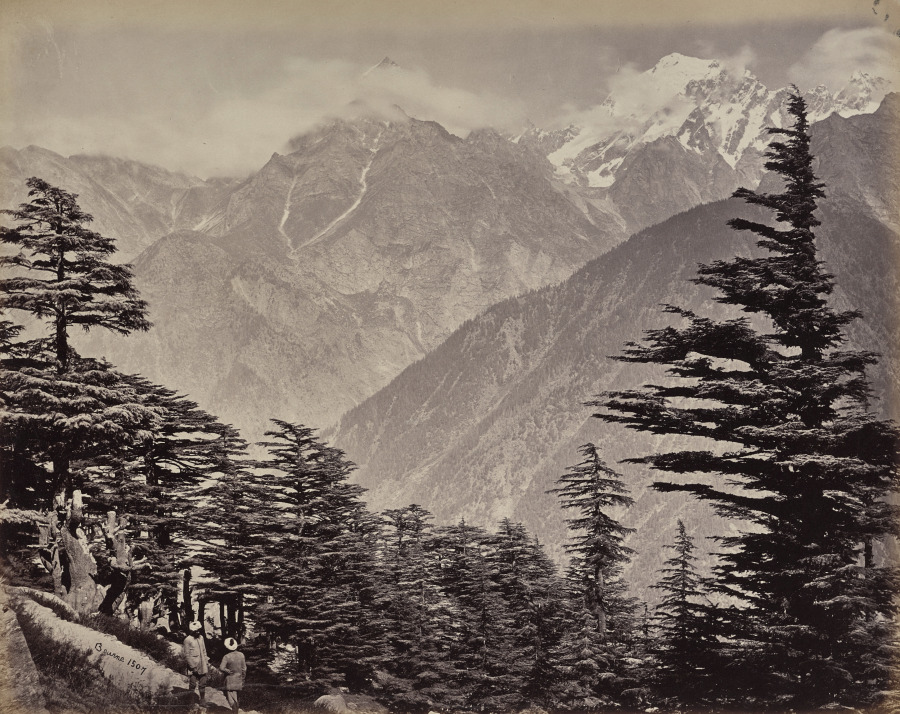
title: The Upper Himmalayahs. View Near China Mountains. Deoders in the Foreground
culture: England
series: Photographs of Northern India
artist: Samuel Bourne (British, 1834–1912)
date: 1863–70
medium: albumen print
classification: Photograph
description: The 50 images in this album, all taken in the 1860s, move from the hill towns of the Himalayas down to cities including Lahore (now in Pakistan), Delhi, Lucknow, Agra, Benares (now Varansi), and Calcutta (now Kolkata). Architectural studies of major monuments offer valuable historical records of what sites such as the Taj Mahal and the imperial mosque of the Mughal emperors in Delhi looked like before 20th-century restorations.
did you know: Samuel Bourne, the author of most the images in this album, was a banker in England before he moved to India to become a professional photographer.